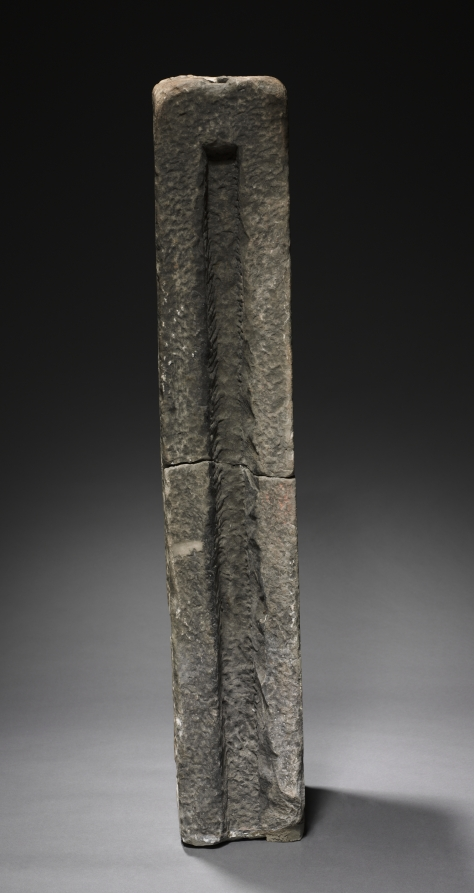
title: Transenna Post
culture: Lombardic, Italy, Rome, Migration period, 8th-9th Century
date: 700s-800s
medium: marble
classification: Sculpture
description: In Christian architecture a transenna is an openwork screen of stone or metal enclosing a shrine. These transenna elements were found in Rome; the posts were said to have been excavated on the Coelian Hill and may have originally formed part of the transenna of the Church of San Saba. The Lombards were an ancient Germanic-speaking tribe that settled in Italy after 568. Their artistic tradition was originally centered on small objects of personal adornment like buckles and brooches. After occupying Italy, the Lombards found themselves in contact with large-scale sculpture of classical and early Christian origin that, by the end of the 700s, they had learned to adopt and imitate, as seen here.